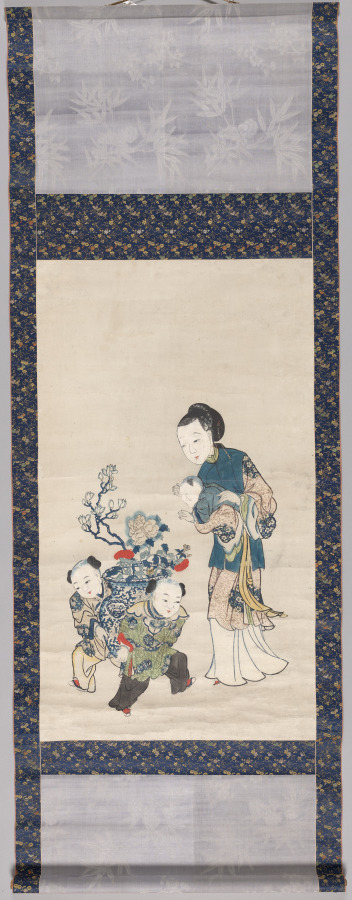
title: Mother and Sons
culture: China, Qing dynasty (1644–1911), Qianlong reign (1736–95)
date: 1736–95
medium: Hanging scroll; polychrome woodblock print; ink and color on paper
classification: Print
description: Woodblock printing in color reached its height in China in the 1600s to 1700s. It was executed by means of sets of separate blocks, each carved to print a different color.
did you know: In the 1600s, printing flourished in such Jiangnan cities as Nanjing, Suzhou, Hangzhou, and Huizhou, evolving from privately enjoyed illustrated books printed in color to more commercialized single-sheet color prints that were hung on walls and became part of the rich urban visual culture.